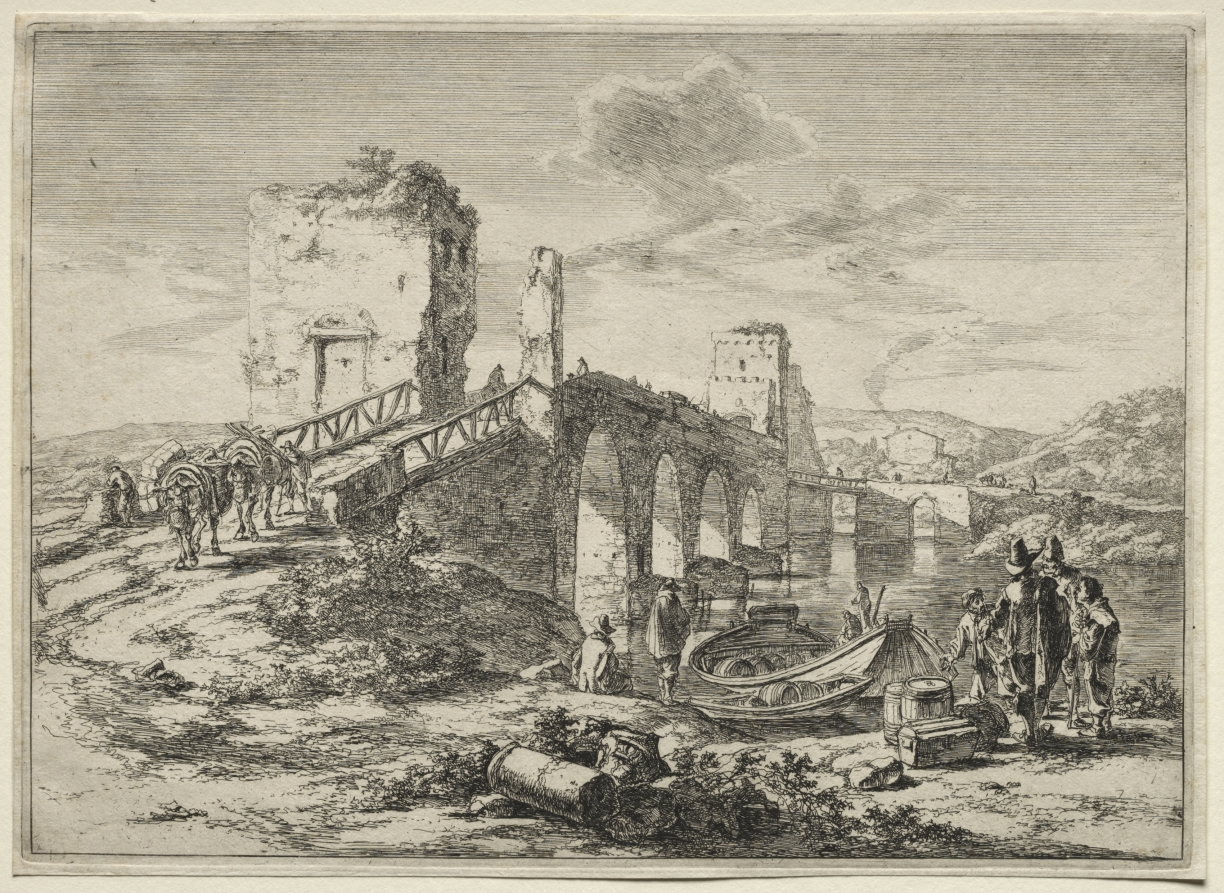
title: The Molle Bridge over the Tiber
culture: Netherlands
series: Landscapes of the Environs of Rome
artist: Jan Both (Dutch, c. 1618–1652)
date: 1636–1652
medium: etching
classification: Print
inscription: VERSO, upper left, in graphite: 0 ; lower left, in graphite: A15b8b / GG. qn ; lower center, in graphite: C12147 ; lower right, in graphite: B5